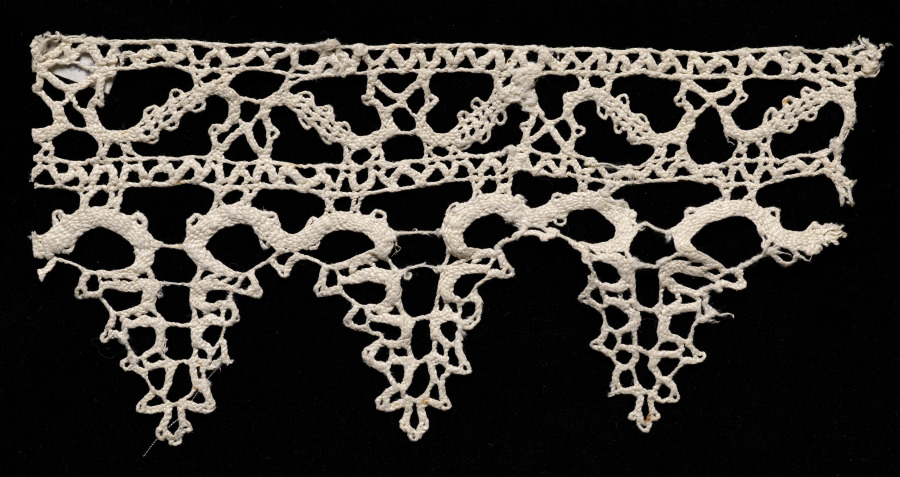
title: Lace Insertion with Edging of Points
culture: Italy, Venice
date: 1500s–1600s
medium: Bobbin lace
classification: Lace